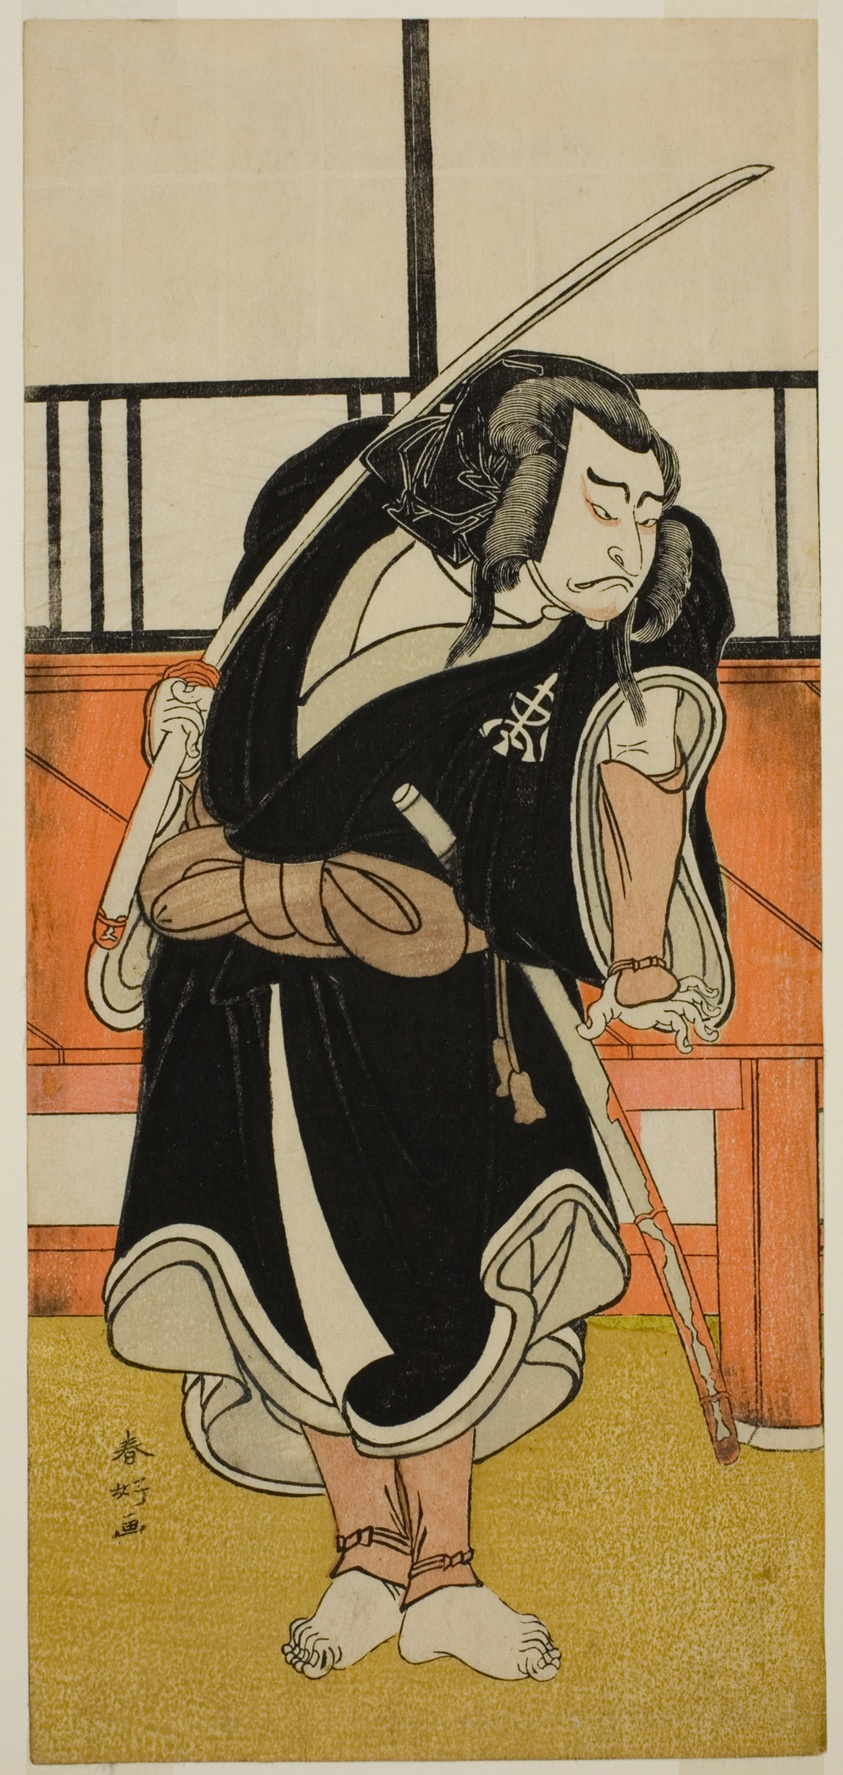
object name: Print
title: The Actor Nakamura Nakazo I as Aso no Matsuwaka (?) in the Play Iro Moyo Aoyagi Soga (?), Performed at the Nakamura Theater (?) in the Second Month, 1775 (?)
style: Japanese (culture or style)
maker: Katsukawa Shunko I; Japanese, 1743-1812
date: c. 1775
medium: Color woodblock print; hosoban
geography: Japan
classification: woodblock print; print; asian art